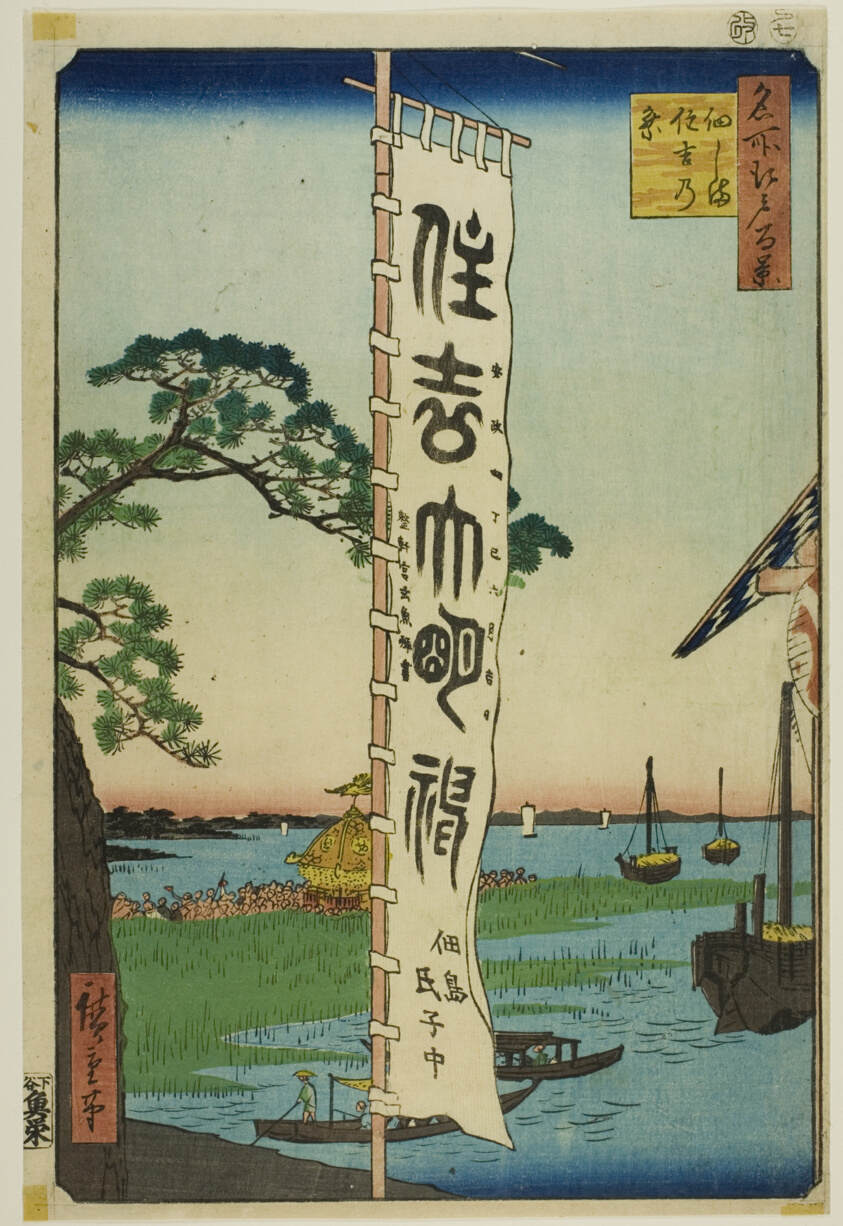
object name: Print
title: Sumiyoshi Festival at Tsukuda Island (Tsukudajima Sumiyoshi no matsuri), from the series "One Hundred Famous Views of Edo (Meisho Edo hyakkei)"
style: Japanese (culture or style)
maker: Utagawa Hiroshige 歌川 広重; Japanese, 1797–1858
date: 1857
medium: Color woodblock print; oban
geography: Japan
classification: woodblock print; print